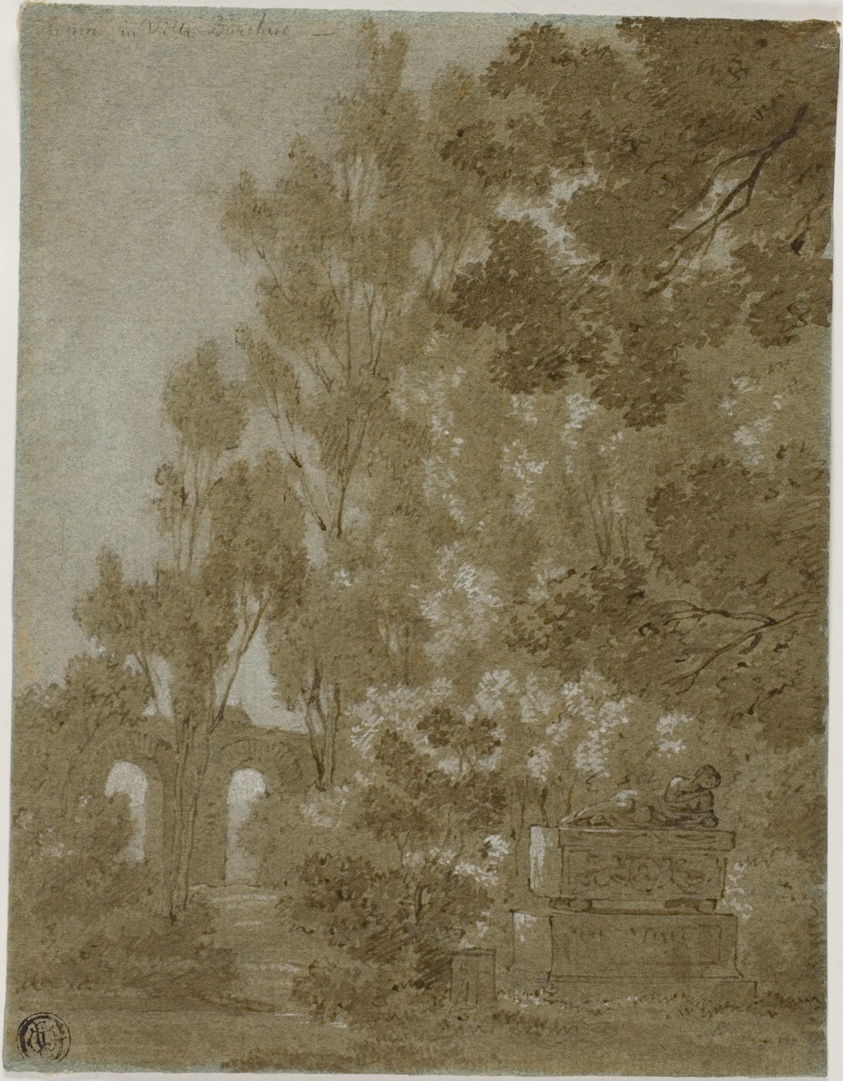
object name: Drawing and Watercolor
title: View of Ruined Arches and Tomb in Villa Borghese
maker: Gaspard Dughet (French, 1615-1675)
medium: Pen and brown ink and brush and brown wash, heightened with white gouache over traces of graphite, on blue laid paper incised and blackened on verso for transfer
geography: France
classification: ink or chalk wash; drawings (visual works); prints and drawing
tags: landscapes